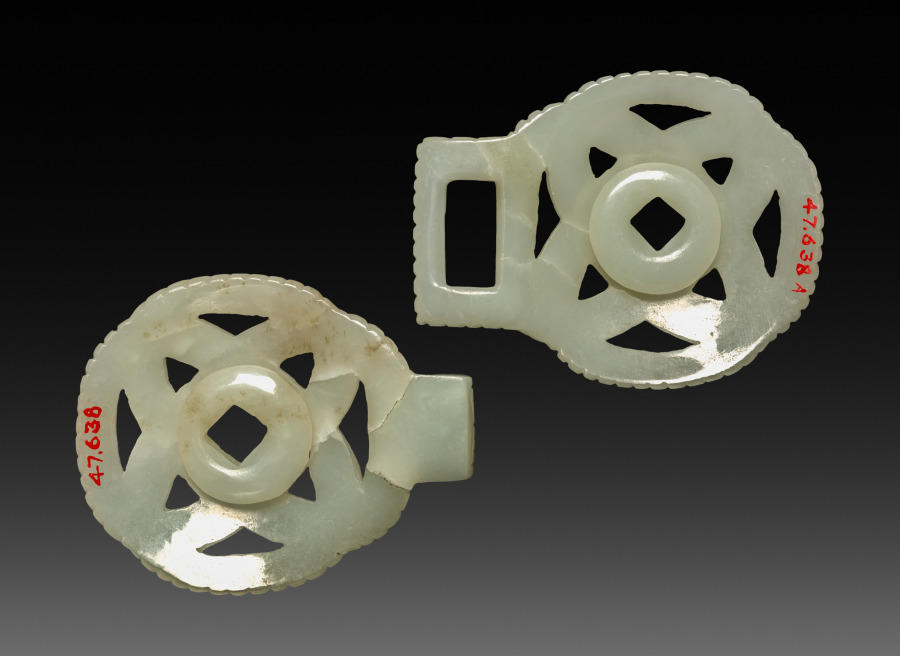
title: Buckle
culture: China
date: 1900s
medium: jade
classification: Jewelry